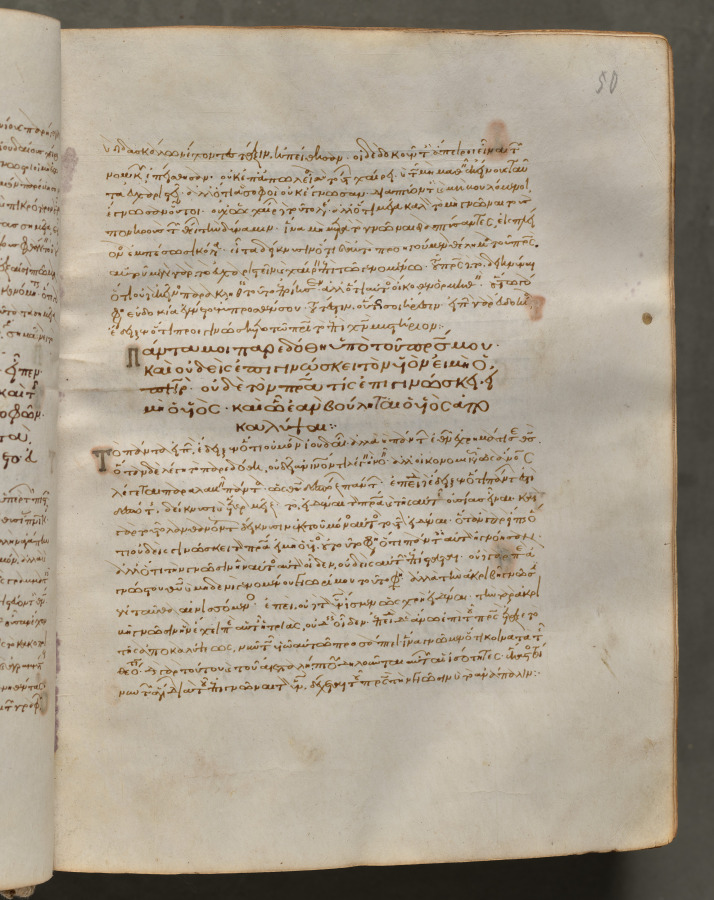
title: Text, folio 50 (recto), from a Gospel Book with Commentaries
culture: Byzantium, Constantinople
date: c. 1000–1100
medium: ink, tempera, and gold on vellum; leather binding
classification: Bound Volume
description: Each of the four gospels in this book opens on a page with brilliantly illuminated borders depicting the author of the text as well as birds-principally peacocks, symbols of the immortality of the soul-and fountains, representing the fountain of life and the salvation of the soul. This volume consists of 428 leaves with texts in Greek. Its level of sophistication suggests that it was probably written and decorated in a monastery in Constantinople.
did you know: Gospel Books were carried in procession through Byzantine churches.